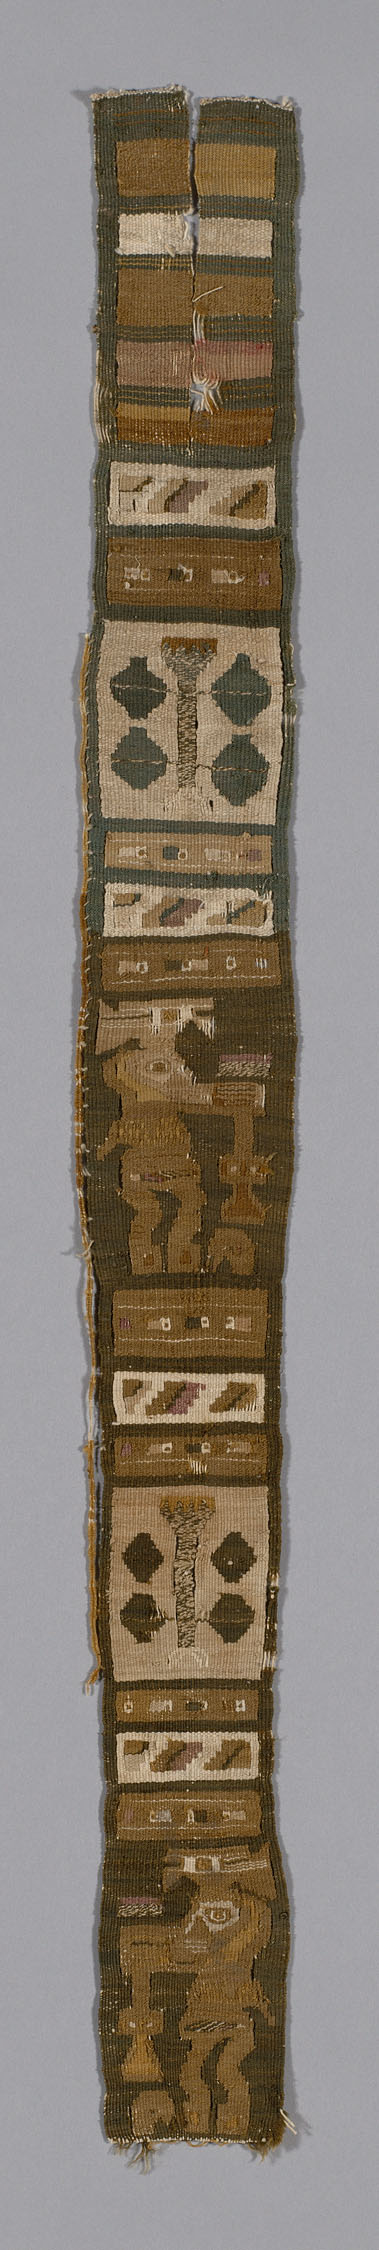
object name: Textile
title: Band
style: lambayeque, Pre-Columbian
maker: Probably Lambayeque; Probably north coast, Peru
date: A.D. 1000/1476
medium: slit tapestry weave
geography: Peru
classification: textile; weaving